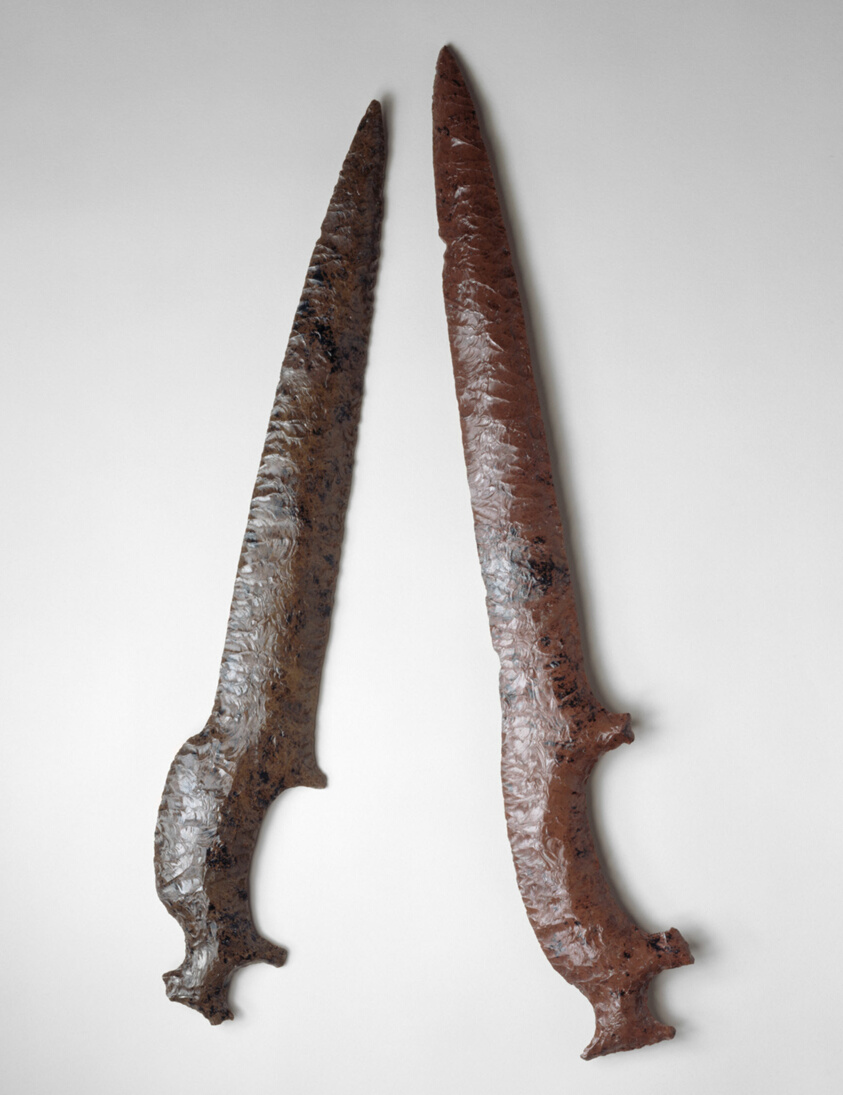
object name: Sculpture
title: Ceremonial Knife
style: colima, americas, mesoamerican, west mexico, Arts of the Americas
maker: Colima (Colima, Mexico)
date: c. 200 CE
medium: Obsidian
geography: Colima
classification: stone; art of the americas; ceremonial object; sculpture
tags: ceremonial objects, weapons